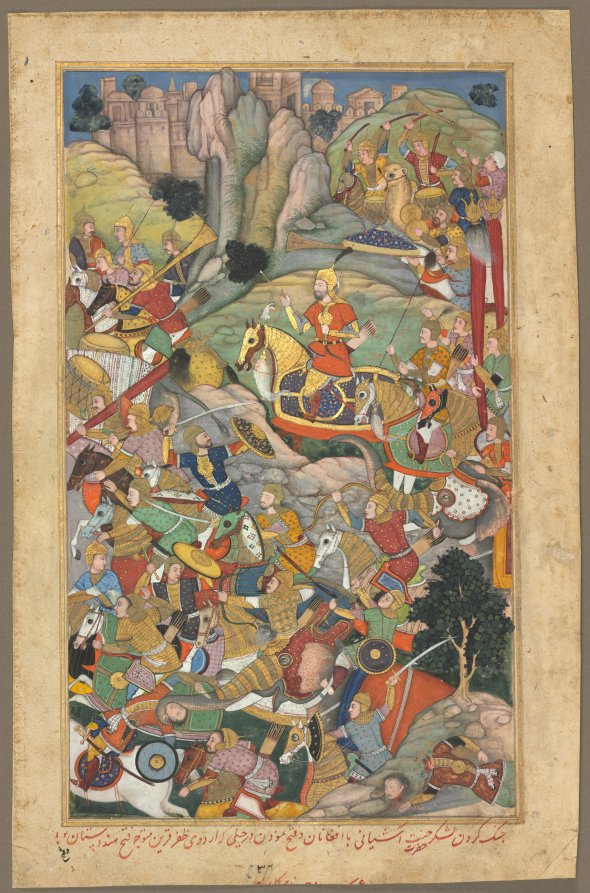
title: Mughal ruler Humayun defeating the Afghans before reconquering India, folio from an Akbar-nama (Book of Akbar) of Abu’l Fazl (Indian, 1551–1602)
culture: Mughal India, court of Akbar (reigned 1556–1605)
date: c. 1590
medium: Gum tempera, ink, and gold on paper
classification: Painting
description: In a battle that took place in 1555, the second Mughal emperor, Humayun, reconquered northern India from the Afghans with the help of Iranian military forces. His mounted figure stands out from the fray, with his golden helmet and red tunic silhouetted against a hillside in the upper center of the composition. To illustrate the beginning of hisown biography, Humayun’s son Akbar included this image of his father riding victoriously back to India. The scene never actually occurred in this way, since Humayun did not participate in this particular battle; his inclusion here is symbolic.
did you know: A well-trained war elephant can pull an opponent off his horse with its trunk.